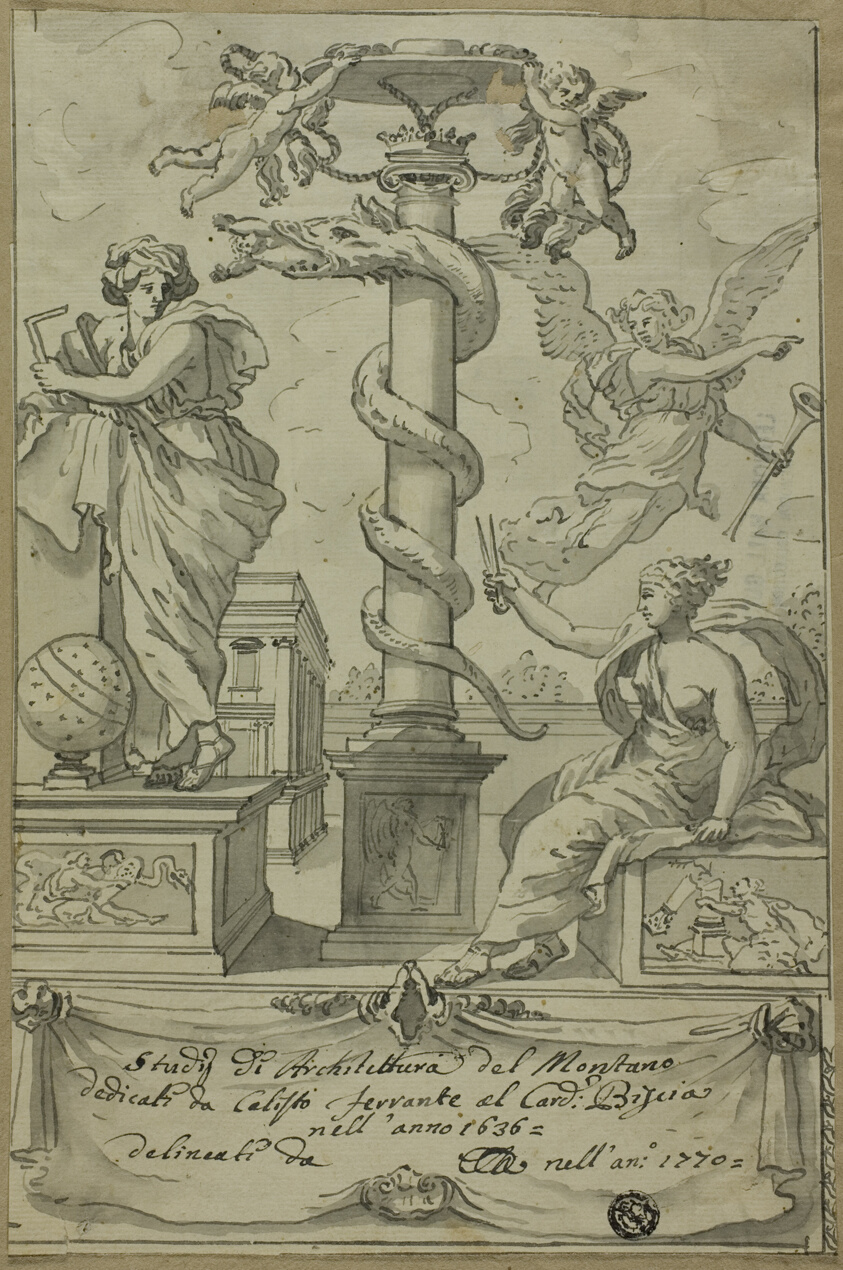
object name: Drawing and Watercolor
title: Frontispiece to Book of Architectural Studies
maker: Unknown Artist; Italian, 18th century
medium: Pen and black ink, with brush and gray wash, on ivory laid paper, tipped on pale brown wove paper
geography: Italy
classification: pen and ink drawings; drawings (visual works); prints and drawing